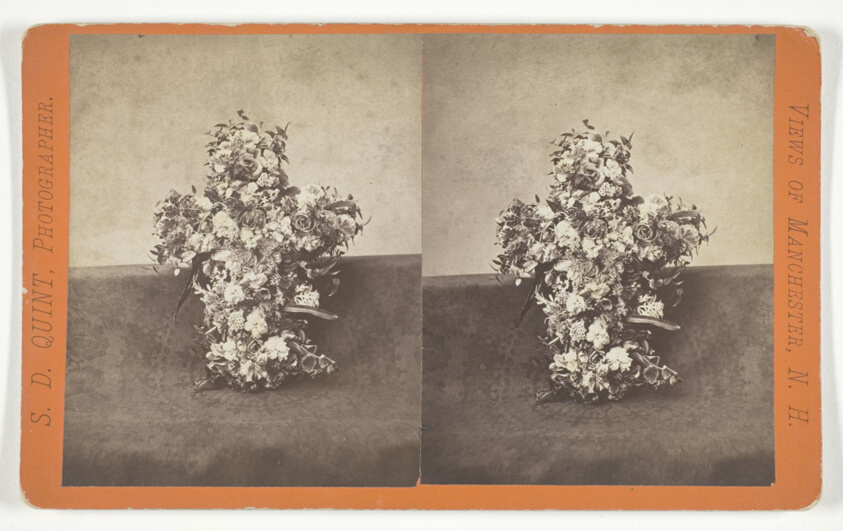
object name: Photograph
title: Untitled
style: 19th century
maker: S.D. Quint (American, active second half 19th century)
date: Mid 19th century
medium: Albumen print, stereo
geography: Manchester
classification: photography; photograph; albumen silver print; stereograph (albumen)